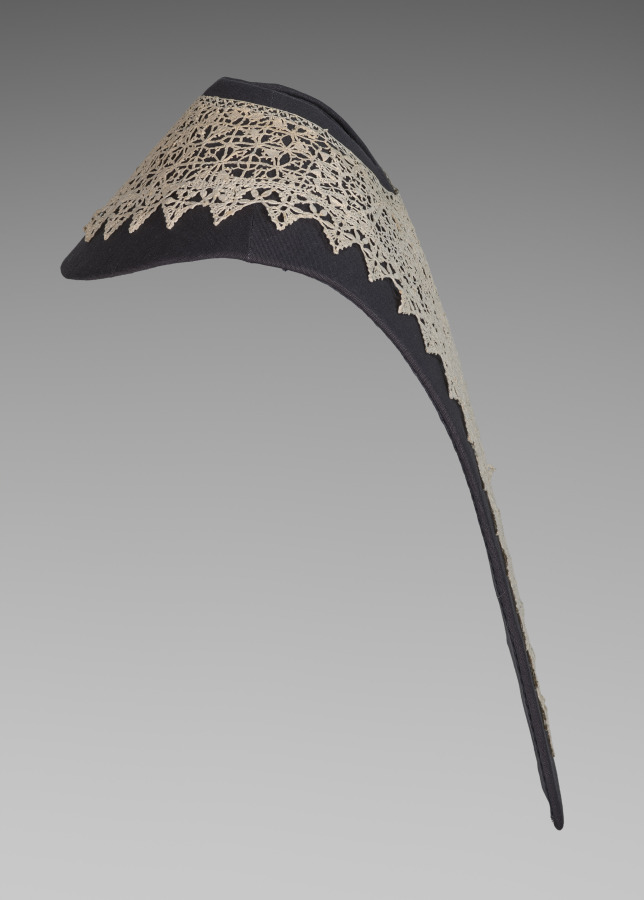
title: Lace Collar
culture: Italy, Genoa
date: 1560–1600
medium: Linen; needle lace (cutwork and reticella) and bobbin lace edging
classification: Lace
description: Large and small round motifs in a linear framework form this geometric design made in open cutwork, now known as reticella. Its fineness was cut from a linen cloth whose woven grid provided a firm ground for the embroiderer to build her lace. A similar design for open cutwork was published in a pattern book by Frederic de Vinciolo in Paris in 1587.